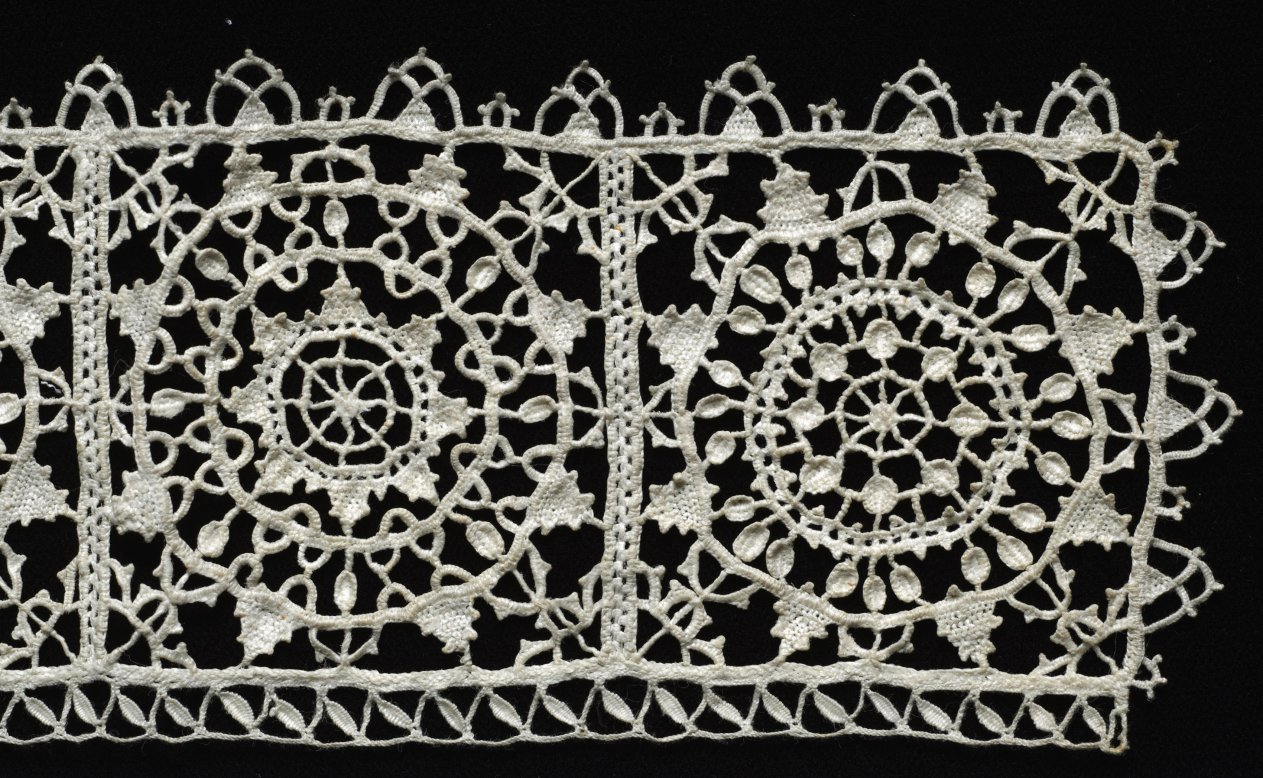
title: Lace Cuff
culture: Italy, Genoa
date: 1550–99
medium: Needle lace (reticella)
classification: Lace